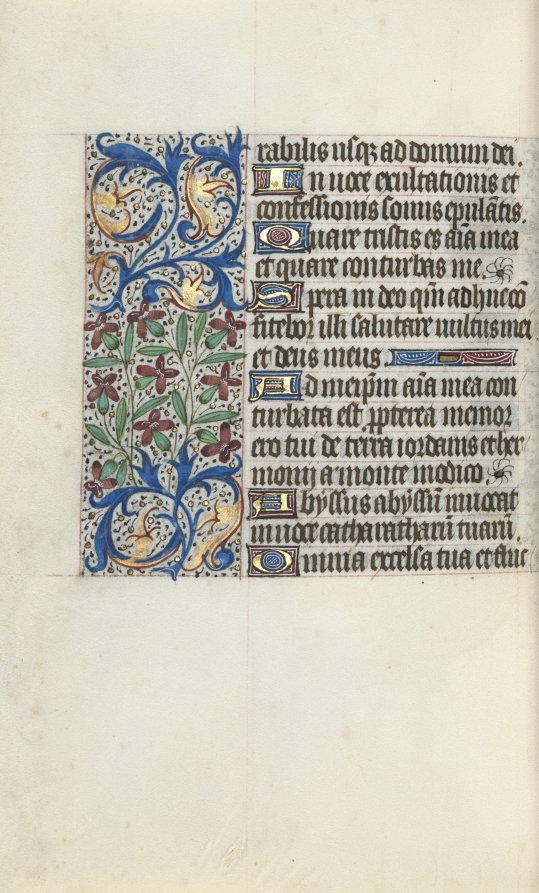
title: Book of Hours (Use of Rouen): fol. 129v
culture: France, Rouen, 15th century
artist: Master of the Geneva Latini (French, active Rouen, 1460–80)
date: c. 1470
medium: ink, tempera, and gold on vellum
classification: Bound Volume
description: In the late 1400s and early 1500s Rouen was an established and important center of book production. The city’s cathedral had a wealthy chapter that spent large sums of money to commission books and to maintain its extensive library. The stationers and booksellers would have likely been concentrated in or near the cathedral precinct. This artist, named after a manuscript now in Geneva, was Rouen’s principal illuminator during the second half of the 1400s.